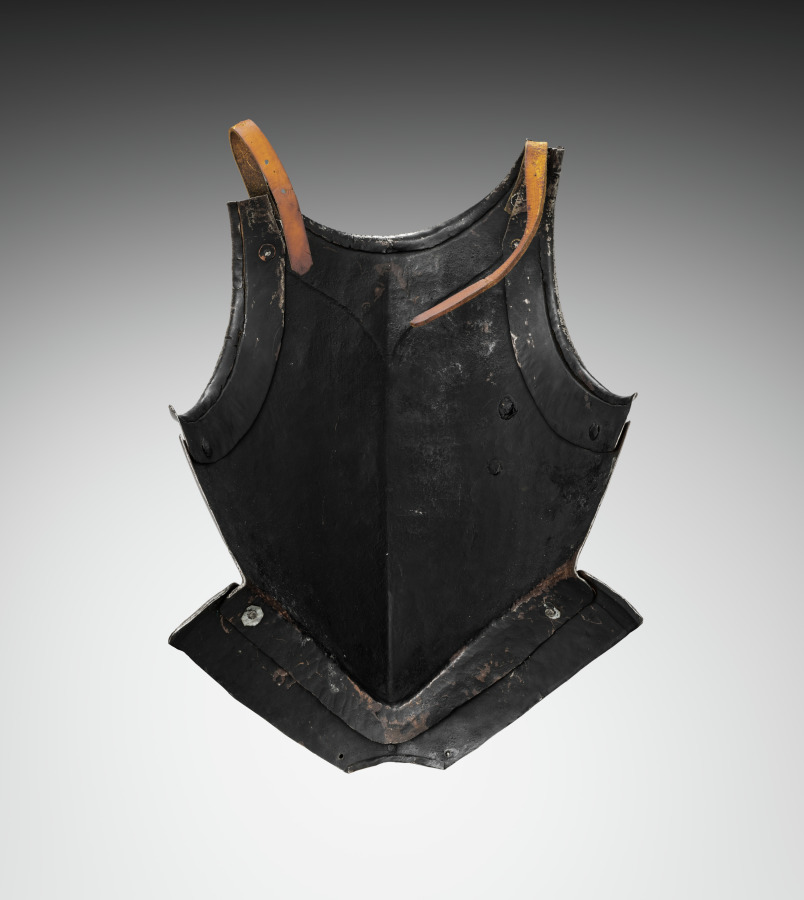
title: Breastplate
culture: South Germany, 16th century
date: c. 1560–1580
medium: steel, leather straps, brass rivets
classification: Arms and Armor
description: This armor was developed for the joust-a sporting combat between two mounted contestants. Although all of the elements of this armor date from the same period, they are not all from the same suit. This armor is thus called "composed." It also shows the asymmetry of jousting armor. The participants rode along a wall-like barrier known as a "tilt" with their left sides facing one another. Consequently, armor on that side of the body had to be thicker. Note the large plate (grandguard) over the left shoulder for extra protection. Also, the breathing holes in the helmet were placed on the right side (farthest from an opponent's lance) to avoid injuries from splinters. The bracket attached to the right breastplate is called the lance-rest, a shock-absorbing support designed to accommodate the lance when "couched" under the right armpit.